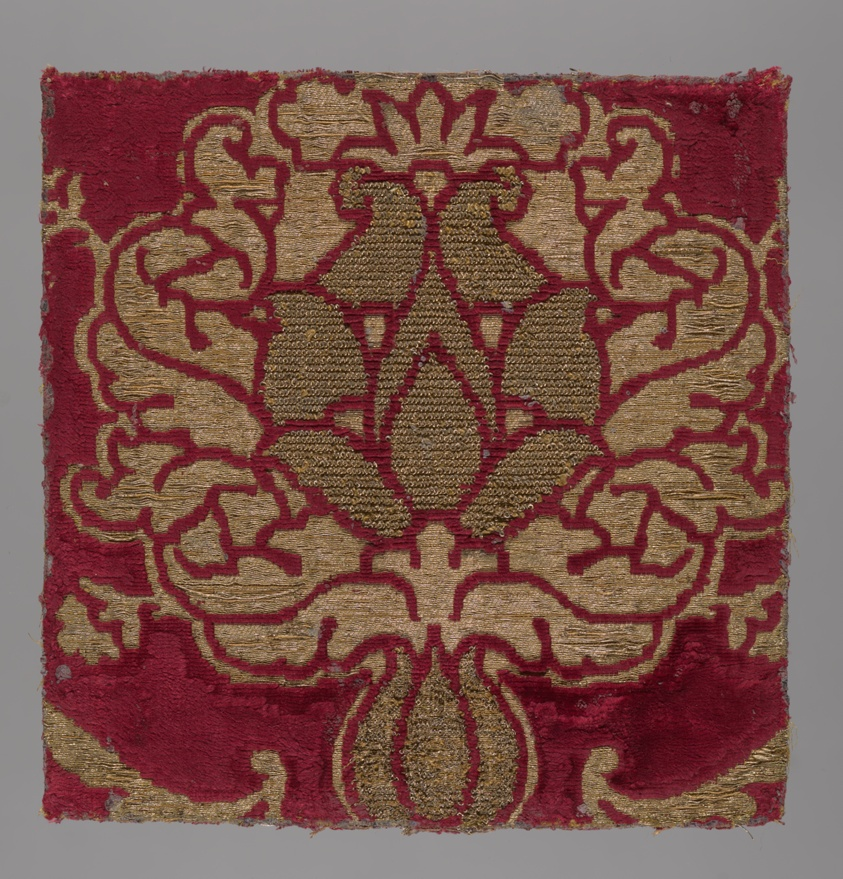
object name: Textile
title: Fragment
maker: Italy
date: 1450/1500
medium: Silk, warp-float faced 3:1 twill weave with weft-float faced 1:3 twill interlacings of secondary binding warps and gilt-metal-strip-wrapped silk supplementary facing wefts and supplementary brocading wefts forming weft loops in areas and with supplementary pile warps forming pile-on-pile cut voided velvet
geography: Italy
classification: textile; weaving - velvet; weaving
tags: pomegranates